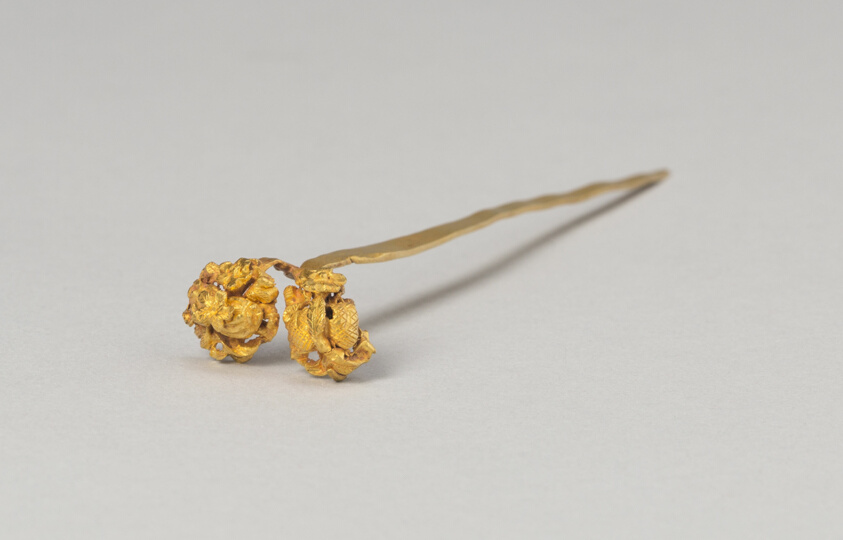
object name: Costume and Accessories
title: Hairpin with Head formed as Twin Clusters of Vine and Blossoms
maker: China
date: Song/Jin dynasty, 12th/13th century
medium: Gold repoussé; openwork with hammered and chased details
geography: China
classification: jewelry; costume